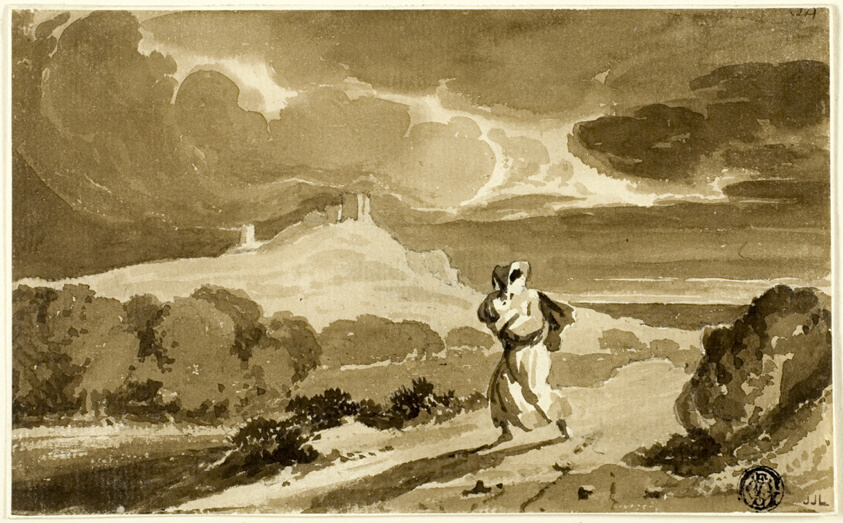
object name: Drawing and Watercolor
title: Woman with Baby Fleeing Across Moors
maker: Possibly John Constable; English, 1776-1837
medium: Brush and brown wash over graphite, on ivory laid paper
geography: England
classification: ink or chalk wash; drawings (visual works); prints and drawing